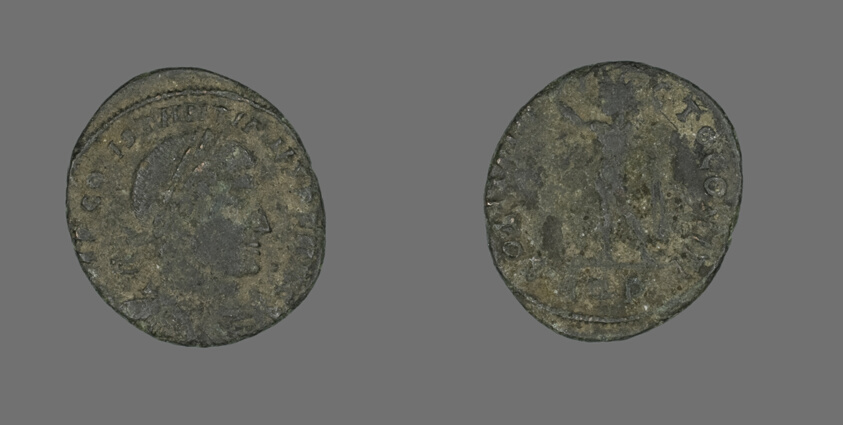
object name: Coin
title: Coin Portraying Emperor Constantine I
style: roman (ancient, style or period), ancient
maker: Roman, minted in Aquileia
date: 317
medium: Bronze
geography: Roman Empire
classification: coin; ancient art